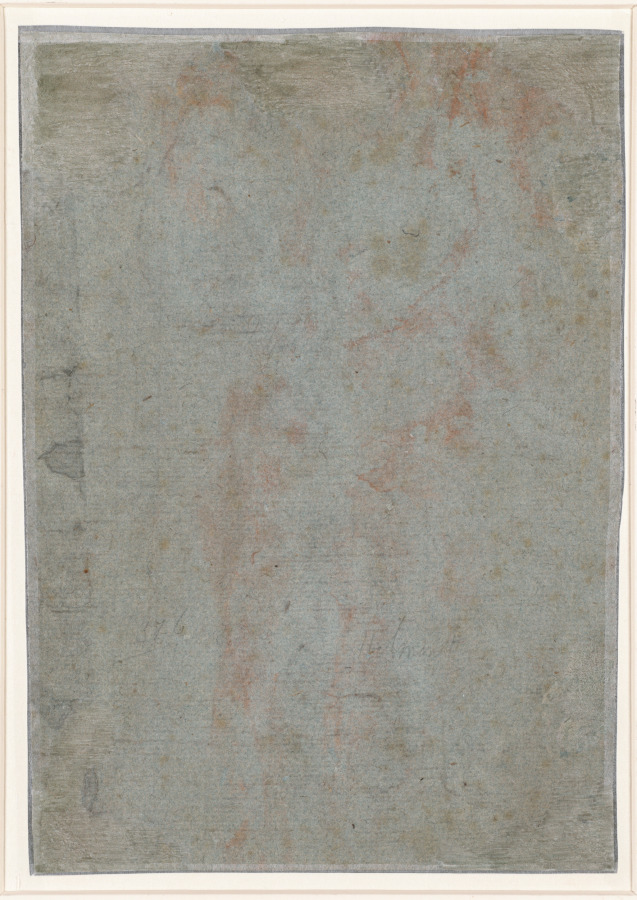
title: Studies of a Naked Seated Boy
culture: Netherlands, 16th - 17th century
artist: Jacob de Gheyn II (Netherlandish, 1565–1629)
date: c. 1603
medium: Black chalk and white chalks with stumping on gray-blue antique laid paper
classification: Drawing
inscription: in graphite, verso: “24” and “376/” and “Helmont”?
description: This sheet of studies of a young male model drawn from various angles is among the earliest nudes drawn from life in the Netherlands. The artist Jacques de Gheyn carefully observed the boy’s body and poses, concentrating on the modeling of his skin and muscles through light and shadow rendered with a combination of black and white chalks on gray-blue paper. The directness of this study was unusual in the Northern Netherlands around 1600, where the vogue for mythological scenes inspired human bodies that were more artificial than natural.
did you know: This sheet of studies of a young male model drawn from various angles is among the earliest nudes drawn from life in the Netherlands.